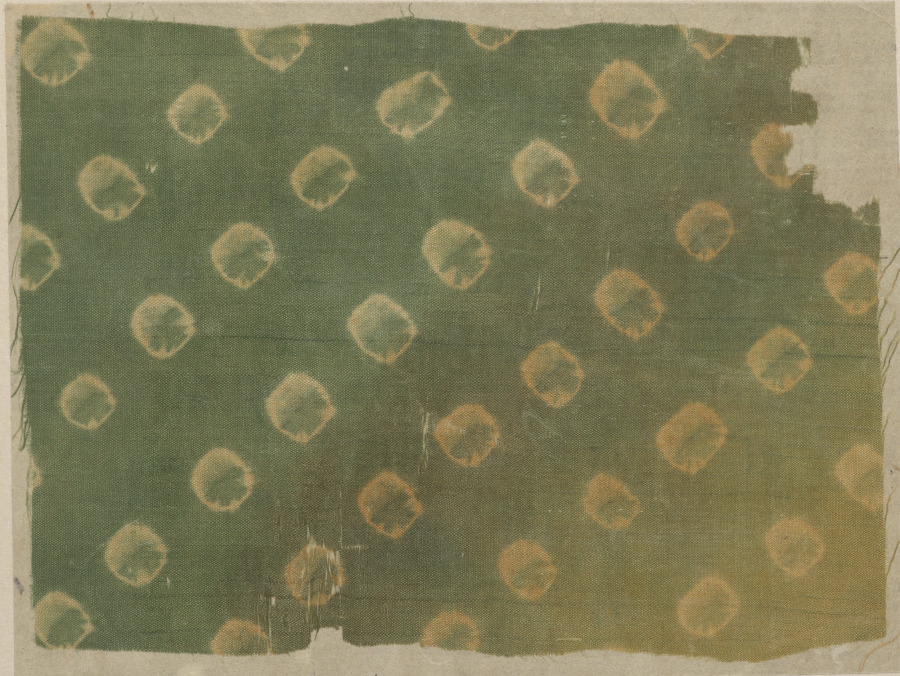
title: Fragment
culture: China or Japan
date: 700s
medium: tabby weave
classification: Textile